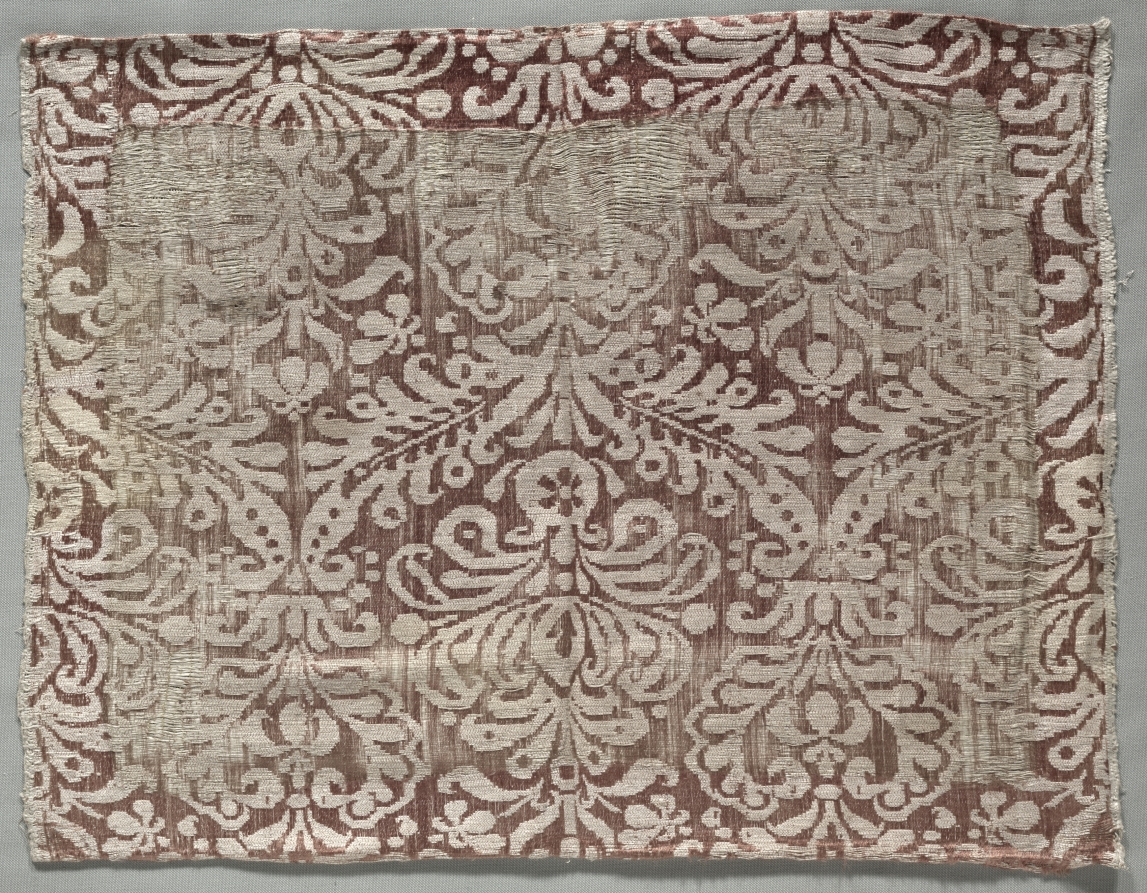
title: Textile Fragment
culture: Italy, 16th century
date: 1500s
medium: damask, silk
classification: Textile